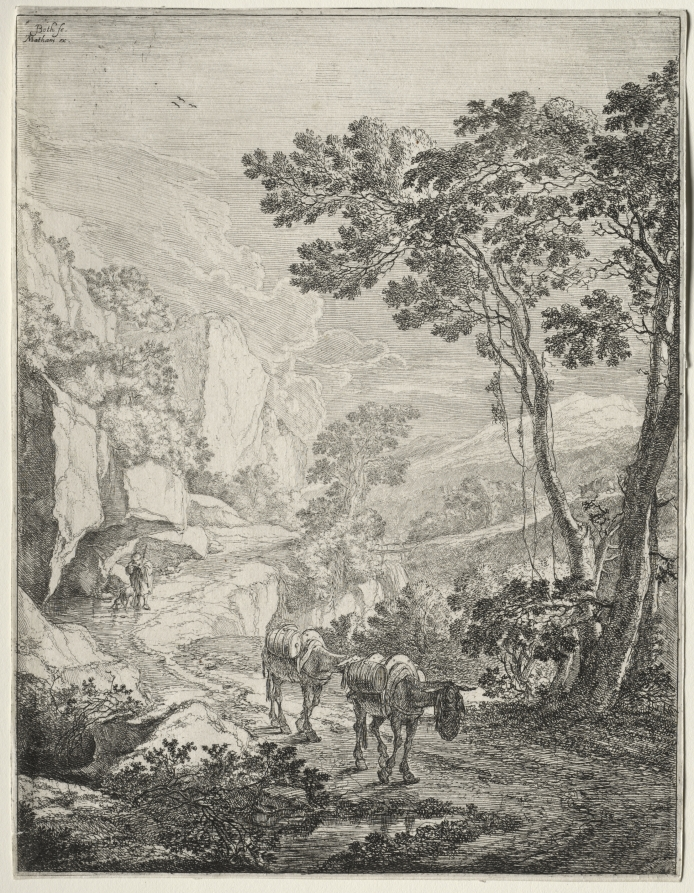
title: The Two Mules. Rocca Aquatico near Ancona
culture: Netherlands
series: The Upright Italian Landscapes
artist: Jan Both (Dutch, c. 1618–1652)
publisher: Matham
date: 1636–52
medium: etching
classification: Print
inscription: upper left, in plate: Both fe. / Matham ex. ; VERSO, upper center, in graphite: 4 / J[B?] ; lower left, in graphite: MK 27307 ; lower center, in graphite: B4 III ; across bottom, in graphite: Les Deux Mulets. Jan Both B. 4. III. ; lower right, in graphite: 7